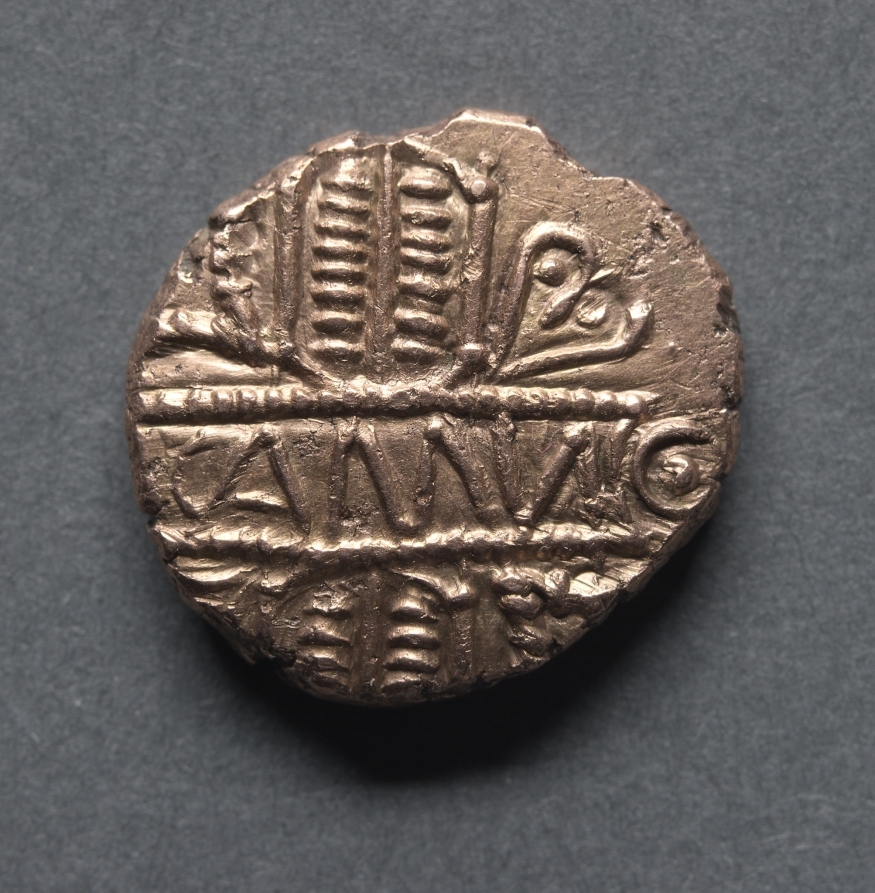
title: Cunobeline Stater: Tablet on Wreath (reverse)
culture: England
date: c. 10–40 CE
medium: gold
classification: Coins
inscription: CAMVL